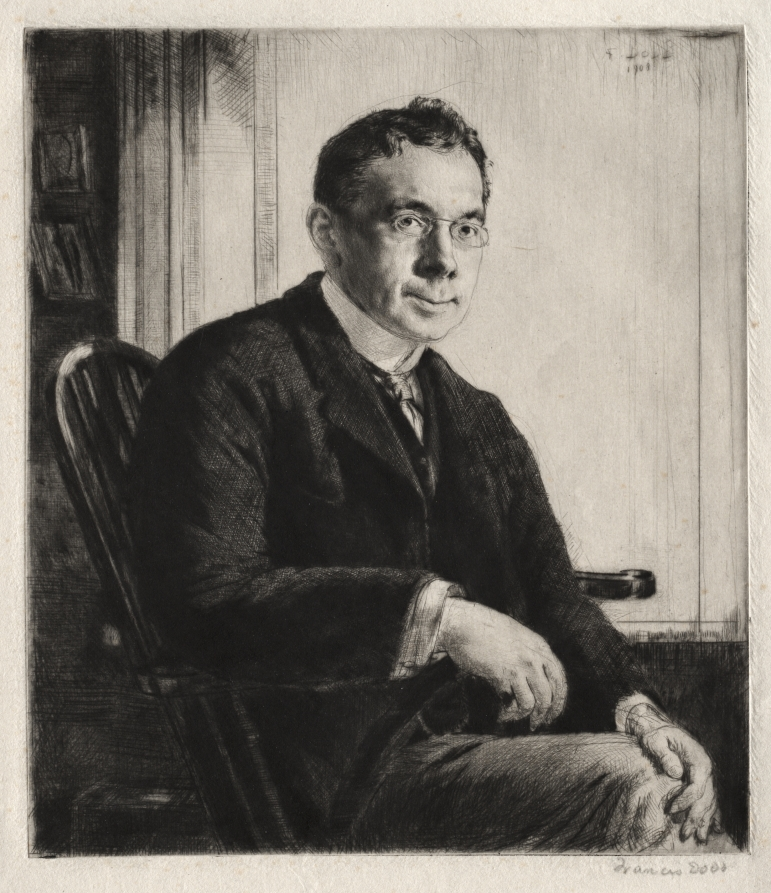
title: Campbell Dodgson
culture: England, 20th century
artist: Francis Dodd (British, 1874–1949)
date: 1908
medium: drypoint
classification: Print